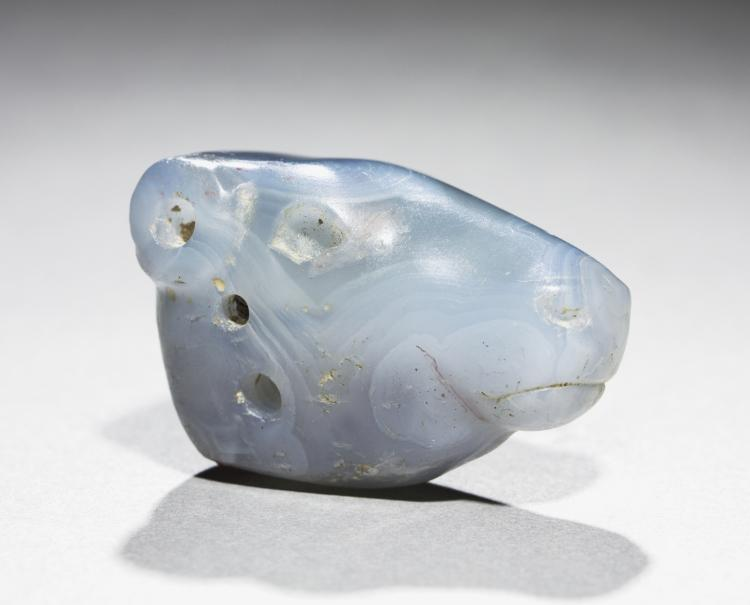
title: Head of a Bull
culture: Mesopotamia, Sumerian, Iraq, Tigris-Euphrates valley, Early Bronze Age I (c. 3300–c. 3000 BCE)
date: 3000–2000 BCE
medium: chalcedony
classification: Sculpture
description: This bull head is carved in a banded stone. The sculptor has ingeniously planned the work so that the veins of the stone enhance the anatomy of the head. Inlays of stone, ivory, or gold (now missing) were set into the eyes and horn sockets. The other holes were used to attach the head to a body of a different material.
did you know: This object is made of quartz, which is used to make electronics today.